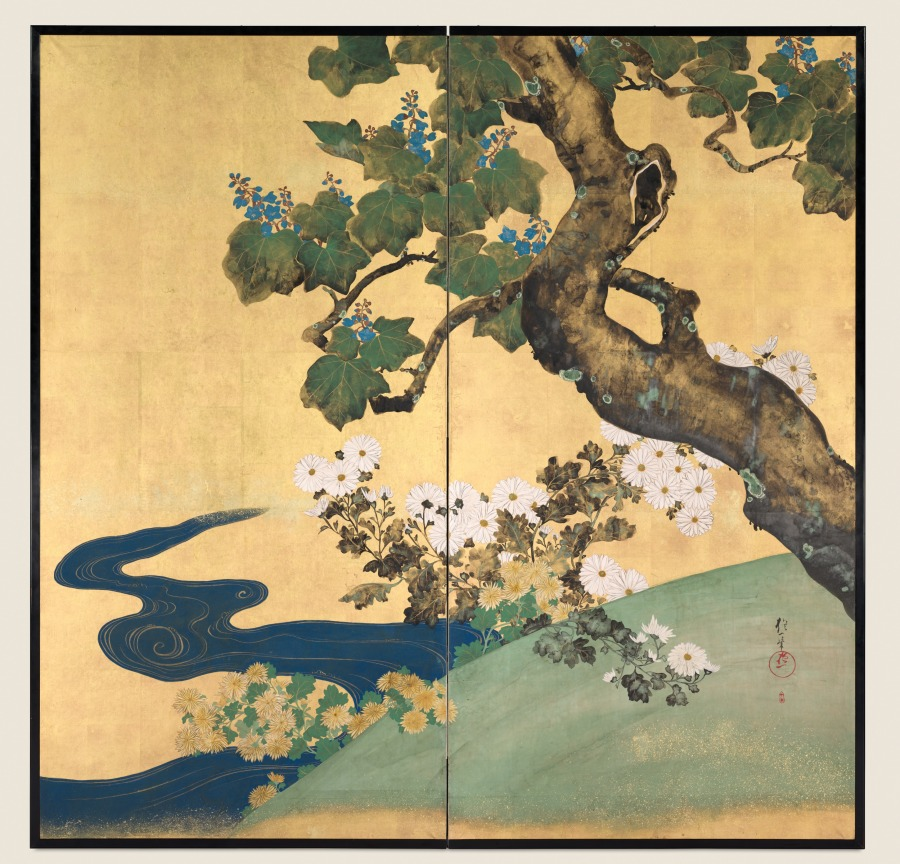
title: Paulownias and Chrysanthemums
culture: Japan, Edo period (1615–1868)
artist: Sakai Hōitsu (Japanese, 1761–1828)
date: early 1800s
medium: Two-panel folding screen; ink and color on gilded paper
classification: Painting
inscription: inscription at right reads: "Hoitsu hitsu" (painted by Hoitsu); within circle: (Hoitsu); tiny gourd shape below encloses two characters "Bun-zen," Hoitsu's name.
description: In this screen, Sakai Hōitsu expertly deployed a painting technique called “dripping-in” (tarashikomi). Ink and color dripped on the surface, and allowed to pool there, created the illusionistic effect of lichen-dotted tree bark and twisted chrysanthemum leaves. Paulownia and chrysanthemum are signifiers of late spring and early autumn as well as emblems of the Japanese imperial house. Paulownia also has medicinal properties and associations with fortitude, while chrysanthemum symbolizes good government.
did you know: Hōitsu often painted two-panel folding screens for urban clients residing in smaller spaces. A painting after this one in the Itabashi Museum in Tokyo shows an extended composition across a pair of two-panel screens.